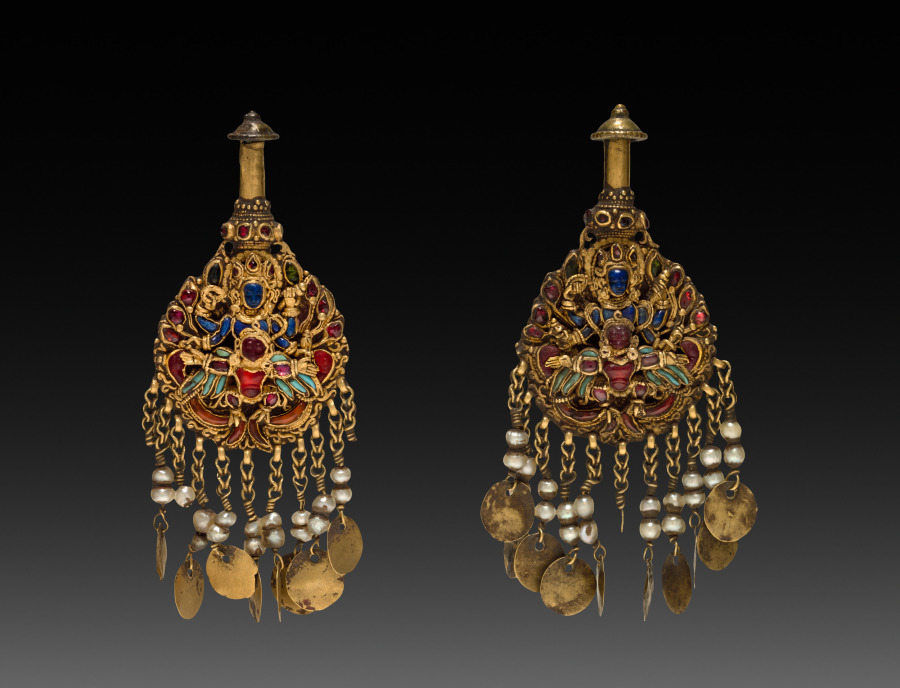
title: Pair of Earrings with Vishnu Riding Garuda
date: 1600s or 1700s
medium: Gold set with precious and semiprecious stones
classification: Jewelry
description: These earrings were made to hang on large bronze sculptures of deities worshipped in Nepalese temples. Nepalese craftsmen excelled at the detailed encrustation of jewels to depict complex figural imagery. They shaped gold wires into a framework, then inserted polished stones into the spaces, held in place with an adhesive. Four-armed Vishnu is made of sapphires; his mount the man-eagle appears to be made of carnelian and spinel with wings of turquoise.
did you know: The father of Jeptha Homer Wade II (1857–1926), who owned these earrings, gave the land for the museum and Wade Oval.